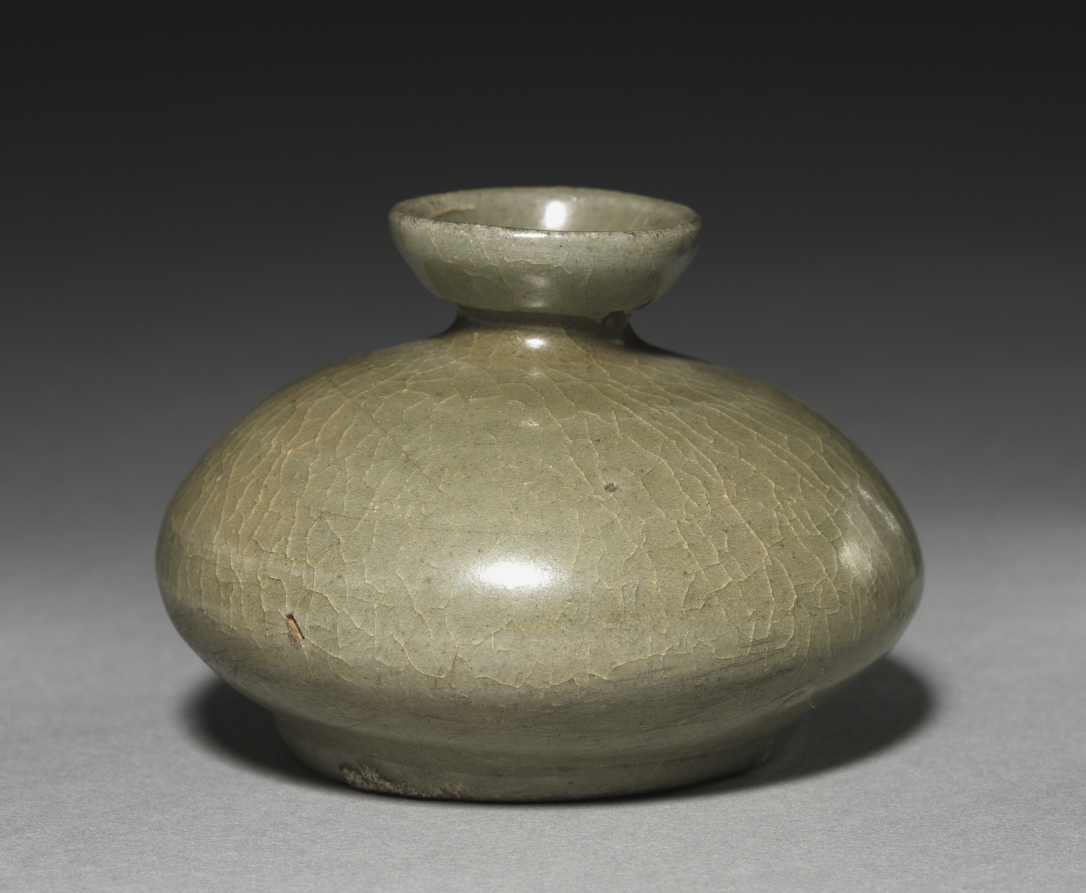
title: Oil Bottle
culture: Korea, Goryeo dynasty (918–1392)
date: 1100s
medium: pottery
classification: Ceramic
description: Celadons, spoons, seals, and bronze mirrors were the most common burial objects in tombs during the Goryeo period (918-1392). Once used to contain oil treatment for hair, this little celadon bottle was one of the standard goods that furnished elites' tombs.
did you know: This bottle was used to contain oil treatment for hair.